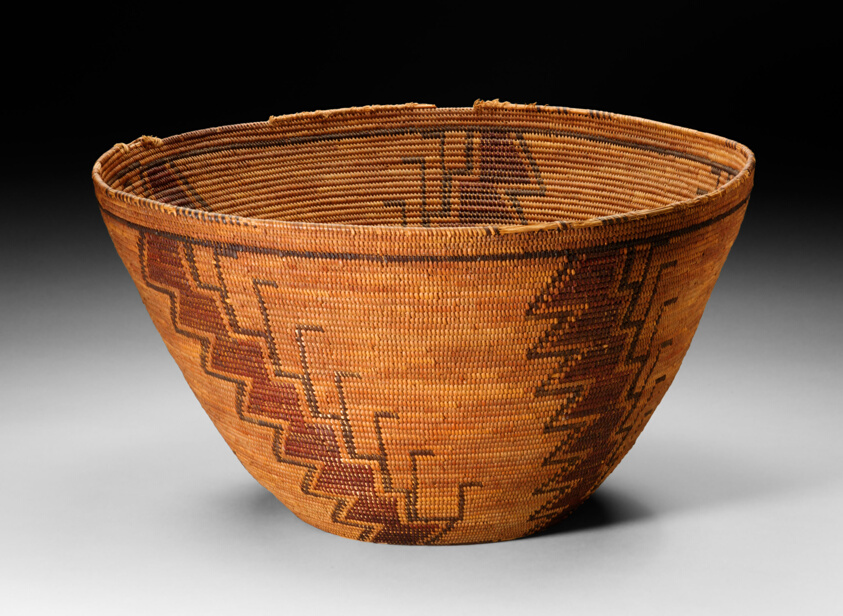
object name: Basketry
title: Coiled Storage Basket with Serrated-line Design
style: pomo, native american, northern california, Arts of the Americas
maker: Pomo (Northern California, United States)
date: 1880–90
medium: Natural vegetable fibers with pigment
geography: California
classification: basketry; plant fiber; art of the americas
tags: basketry, baskets